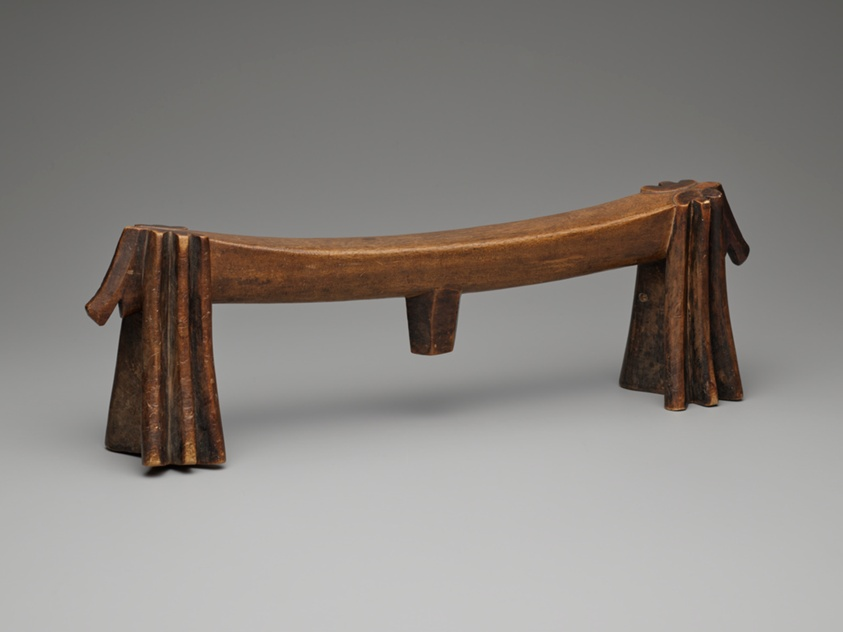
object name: Sculpture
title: Headrest (Isicamelo)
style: swazi (nguni), Eastern and Southern Africa, south african, Arts of Africa, african Art, 19th century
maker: Swazi; Eswatini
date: 19th century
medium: Wood and pokerwork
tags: Headrest